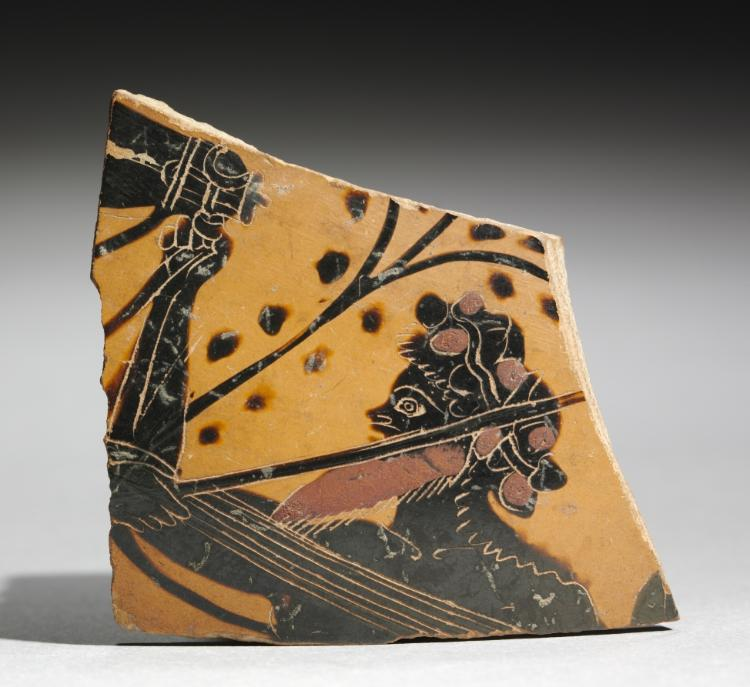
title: Fragment from Black-Figure Neck-Amphora (Storage Vessel): Satyr and Horse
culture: Greek, Attic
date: c. 520–510 BCE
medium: ceramic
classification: Ceramic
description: This small fragment preserves part of a harnessing scene. At left is part of the muzzled head of a horse, guided by a red-bearded satyr wearing a wreath. Before him are the hands of a charioteer—perhaps Dionysos—holding reins and a goad, with a branch in the background. The unfinished interior identifies this as part of a closed vessel, likely a neck-amphora.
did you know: Greek horsemen often muzzled their horses to prevent biting.